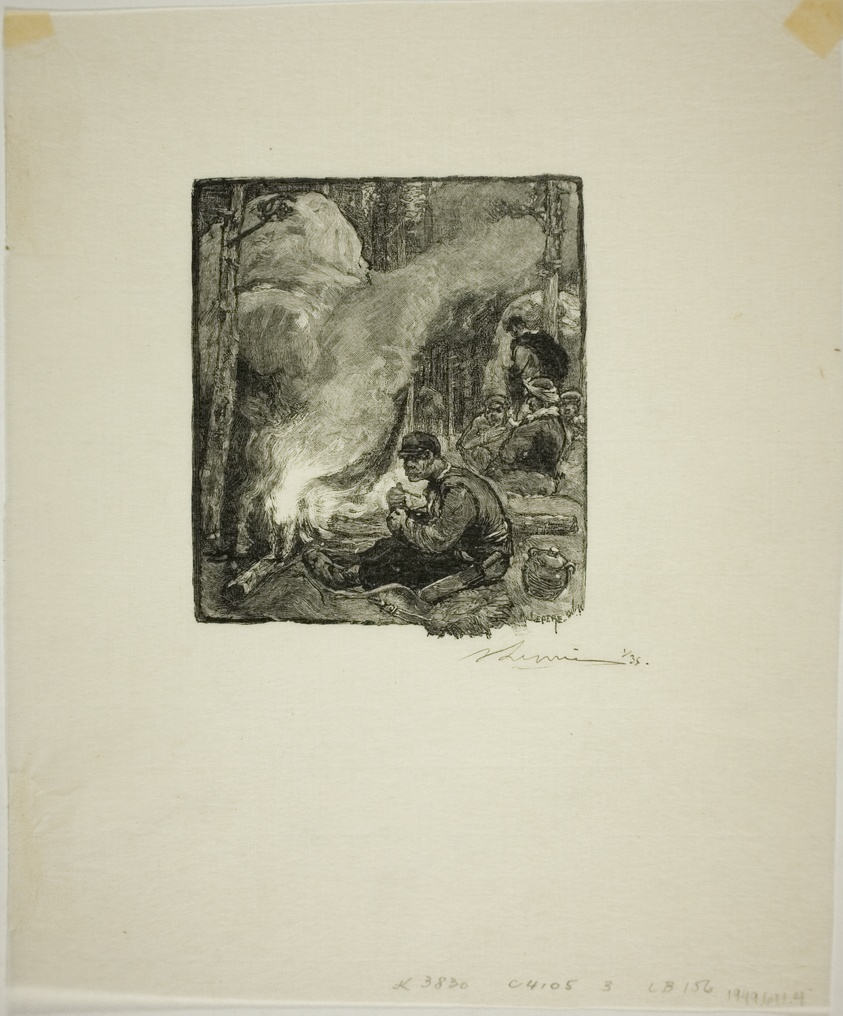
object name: Print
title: Woodcutters' Meal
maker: Louis Auguste Lepère (French, 1849-1918); published by A. Desmoulins (French, active c. 1908-1910)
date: 1887, published 1908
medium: Wood engraving in black on cream laid Japanese paper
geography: France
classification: wood engraving; print; prints and drawing